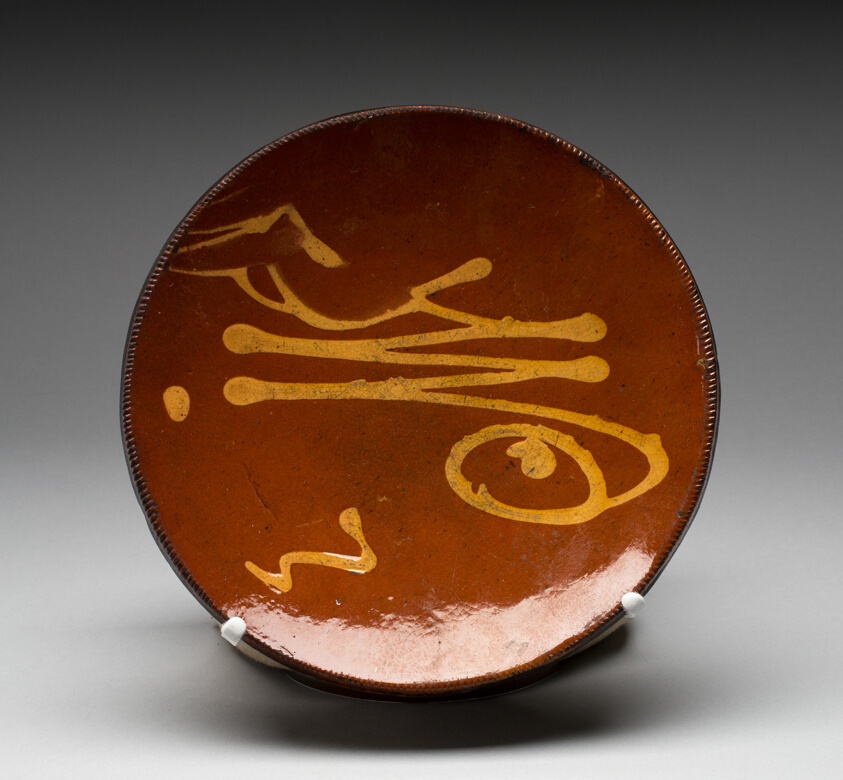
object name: Decorative Arts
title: Plate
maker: Attributed to George Wolfkiel; American, 1805-1867; River Edge, New Barbadoes Township (now Hackensack), Bergen County, NJ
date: c. 1830–67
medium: Earthenware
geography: River Edge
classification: plate (general, dish); dish (vessel); american decorative arts; ceramics; decorative arts